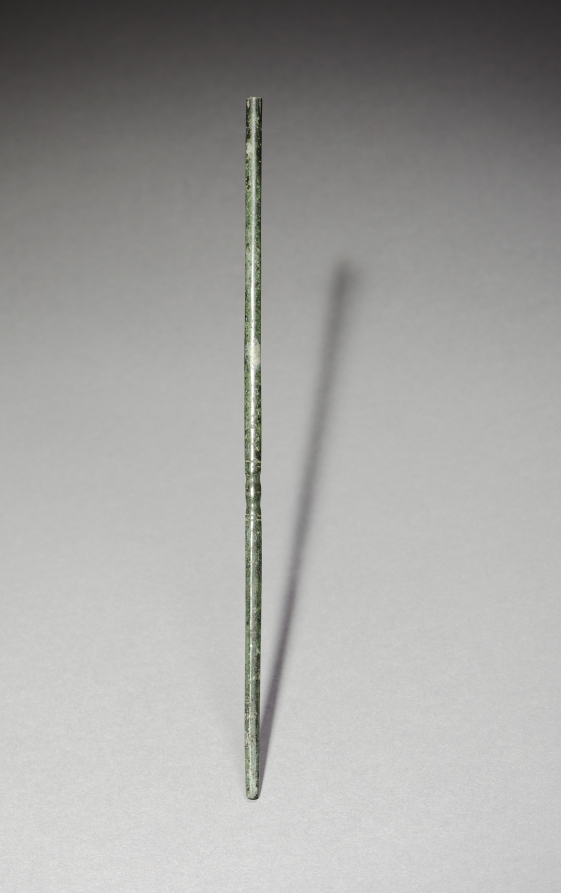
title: Chopstick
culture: Korea, Goryeo dynasty (918–1392)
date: 918–1392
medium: bronze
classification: Metalwork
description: In Korea, chopsticks made of metal such as brass, silver, and gold were excavated from ancient tombs and ruins dated to the 6th century at the earliest. Burial goods often include utilitarian objects such as table wares and utensils because the dead were believed to need them in the afterlife.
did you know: In contrast to the Chinese and Japanese, Koreans still prefer metal chopsticks (stainless steel and brass) to wooden ones.